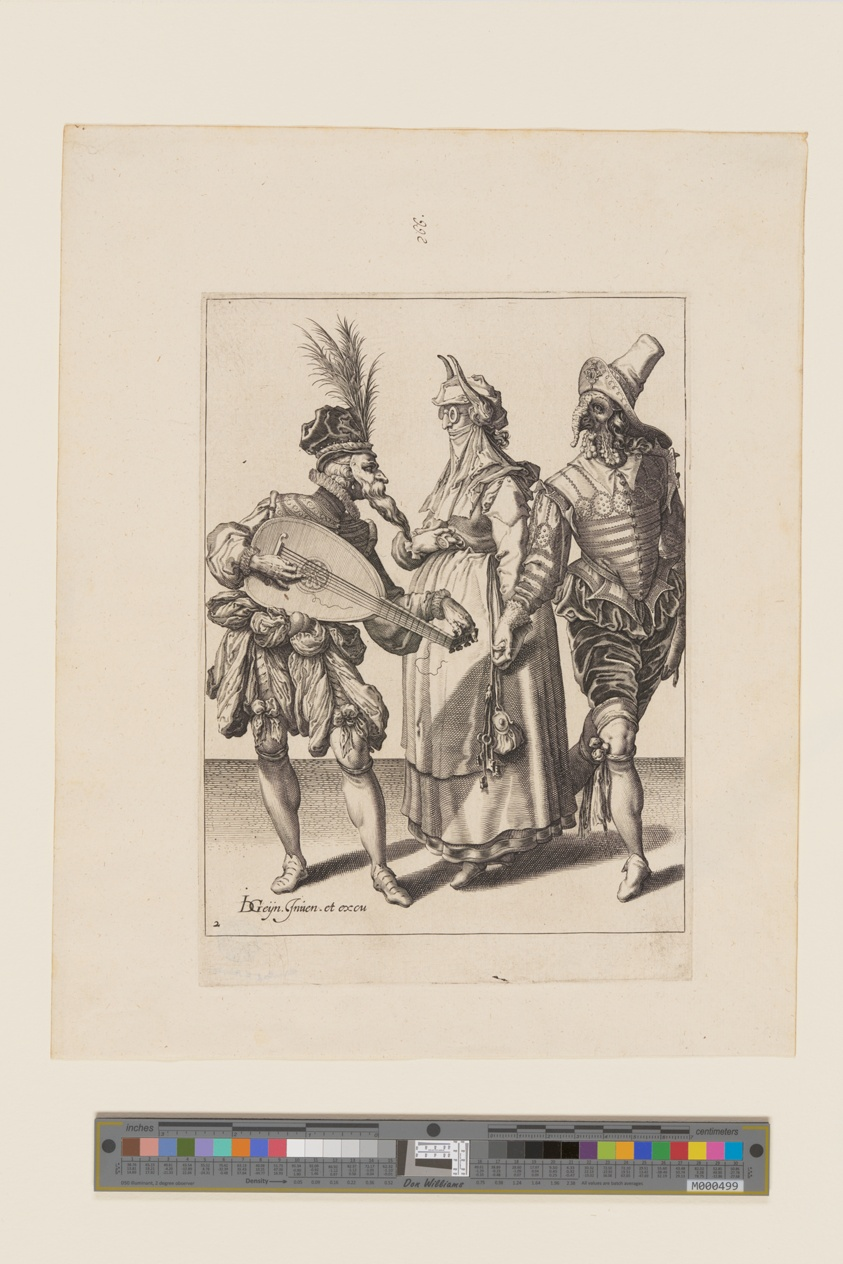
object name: Print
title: A Couple Addressed by a Lute Player, from The Masquerades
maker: Jacques de Gheyn II; Dutch, 1565–1629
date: 1595-96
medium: Engraving on ivory laid paper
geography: Netherlands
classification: engraving; paper; print; prints and drawing